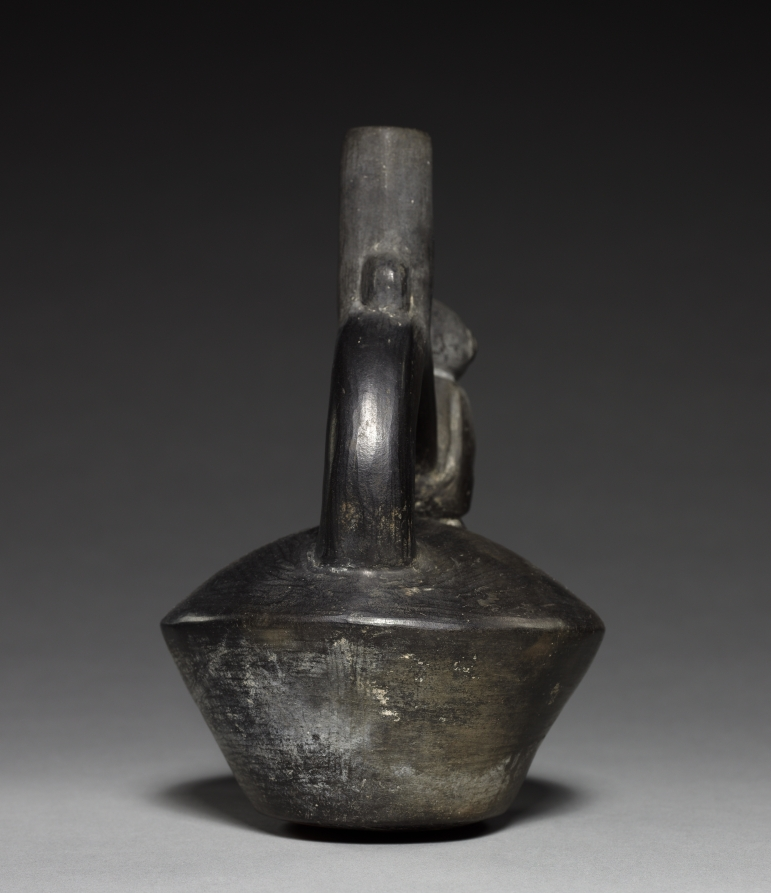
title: Vessel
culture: Peru, Chimú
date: 1300–1400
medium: black ware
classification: Ceramic